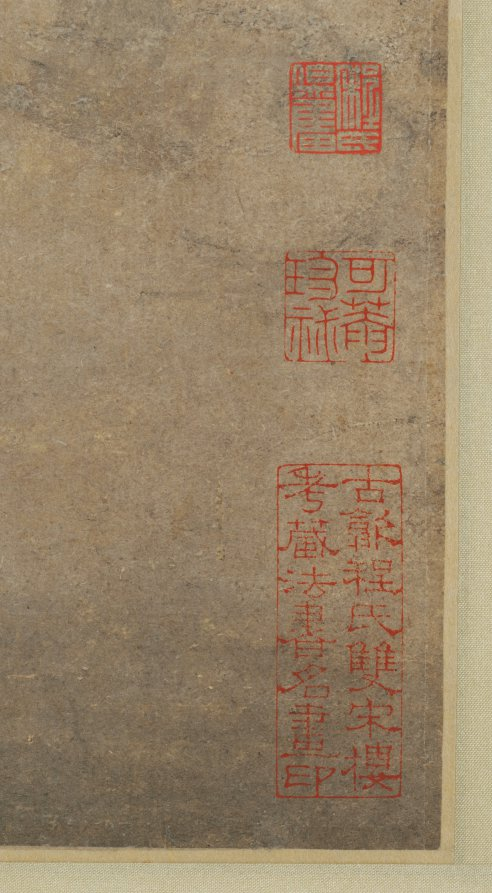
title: Clouds and Waves at the Wu Gorge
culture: China, Ming dynasty (1368–1644)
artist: Xie Shichen (Chinese, 1487–after 1567)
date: c. 1547–67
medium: hanging scroll; ink and light color on paper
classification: Painting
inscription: "巫峽雲濤" 謝時臣寫 [印] 姑蘇台下逸人; 樗仙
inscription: 5 additional seals of Cheng Qi 程琦 (1911–1988).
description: This dramatic landscape was probably painted after Xie Shichen returned from a journey in 1547 that took him through various provinces of China, including Sichuan Province in southwest China and sailing the Yangzi River. The composition from a high vantage point offers a view deep into the Wu Gorge where rolling waves put a ship in peril. The scale and composition of this landscape, which was inspired by the majestic mountain scenery in Sichuan Province, as well as Xie’s vigorous brushwork, are exceptional.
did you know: This large painting was likely created for a wealthy or powerful family's grand hall to impress their visitors.